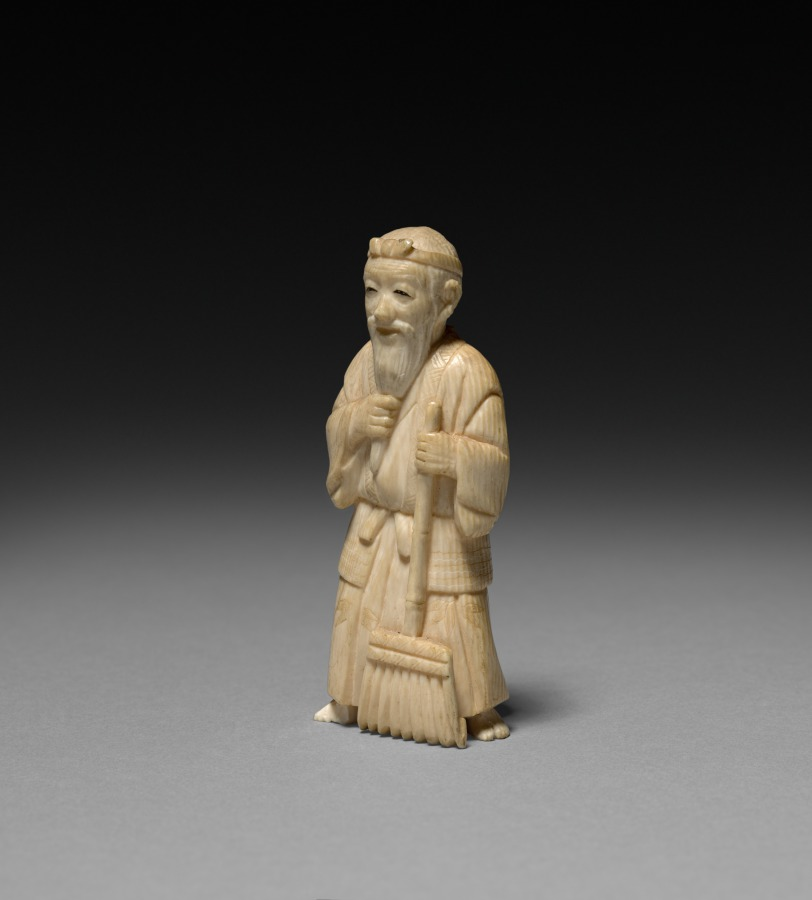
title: Japanese Man with Rake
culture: Japan, Meiji period (1868–1912)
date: early 1900s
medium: ivory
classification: Ivory